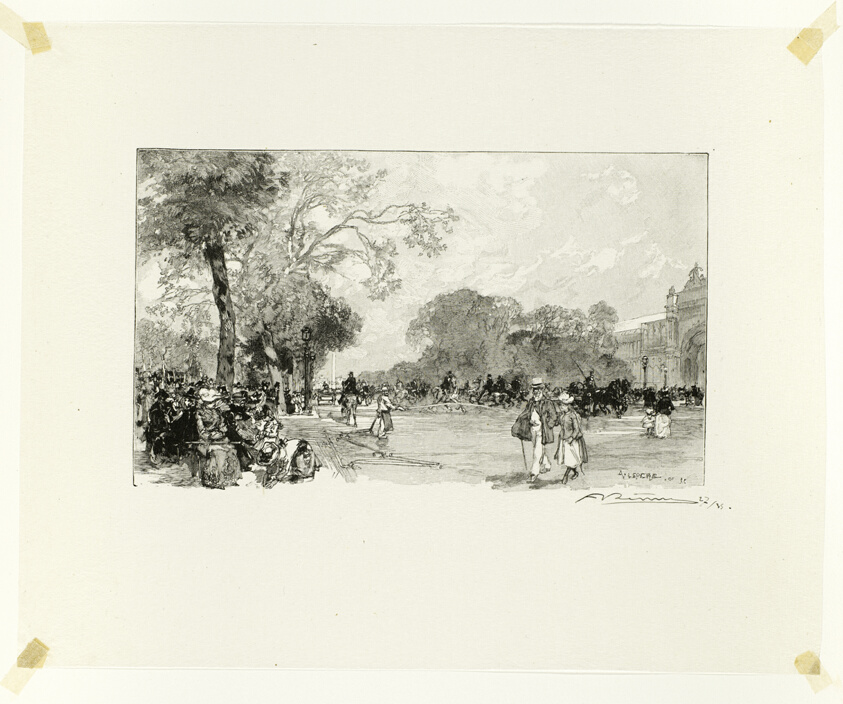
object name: Print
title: L'Avenue des Champs-Élysées, plate eighteen from Le Long de la Seine et des Boulevards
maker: Louis Auguste Lepère (French, 1849-1918); published by A. Desmoulins (French, active c. 1908-1910)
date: 1890, published 1910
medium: Wood engraving in black on cream Japanese tissue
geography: France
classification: wood engraving; paper; print; prints and drawing